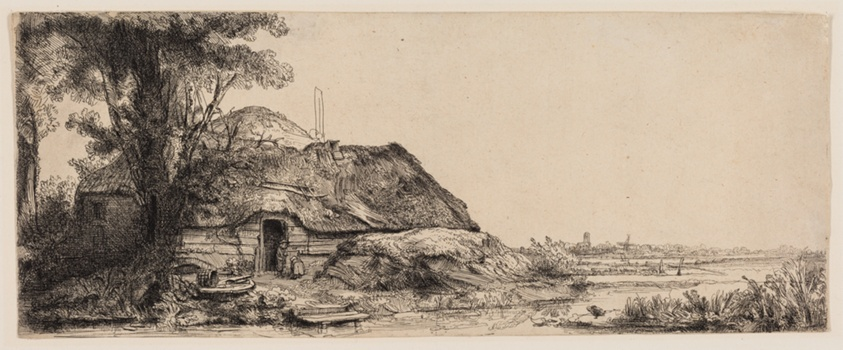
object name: Print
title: Landscape with a Cottage and a Large Tree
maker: Rembrandt van Rijn (Dutch, 1606-1669)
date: 1641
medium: Etching on ivory laid paper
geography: Holland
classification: etching; print; prints and drawing; paper